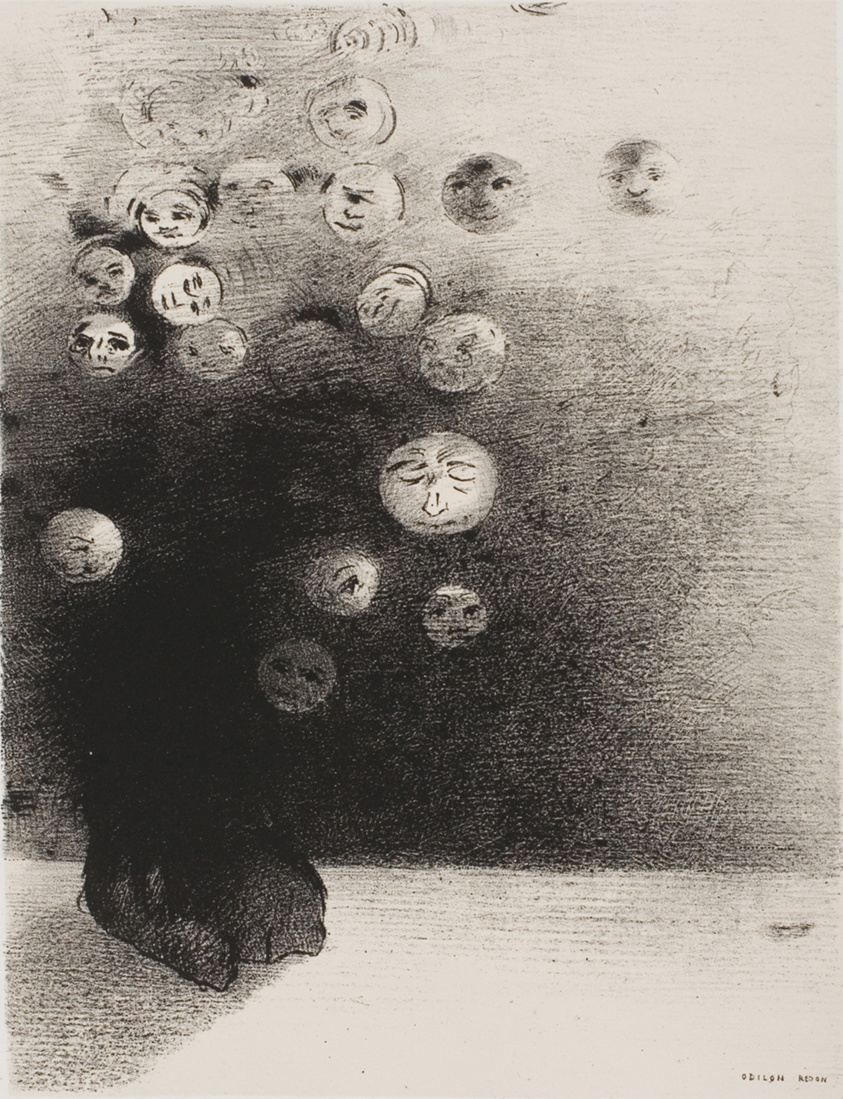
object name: Print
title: Is There Not an Invisible World, from The Juror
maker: Odilon Redon (French, 1840-1916)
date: 1887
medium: Lithograph in black on cream China paper, laid down on white wove paper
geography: France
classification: lithograph; print; prints and drawing; paper